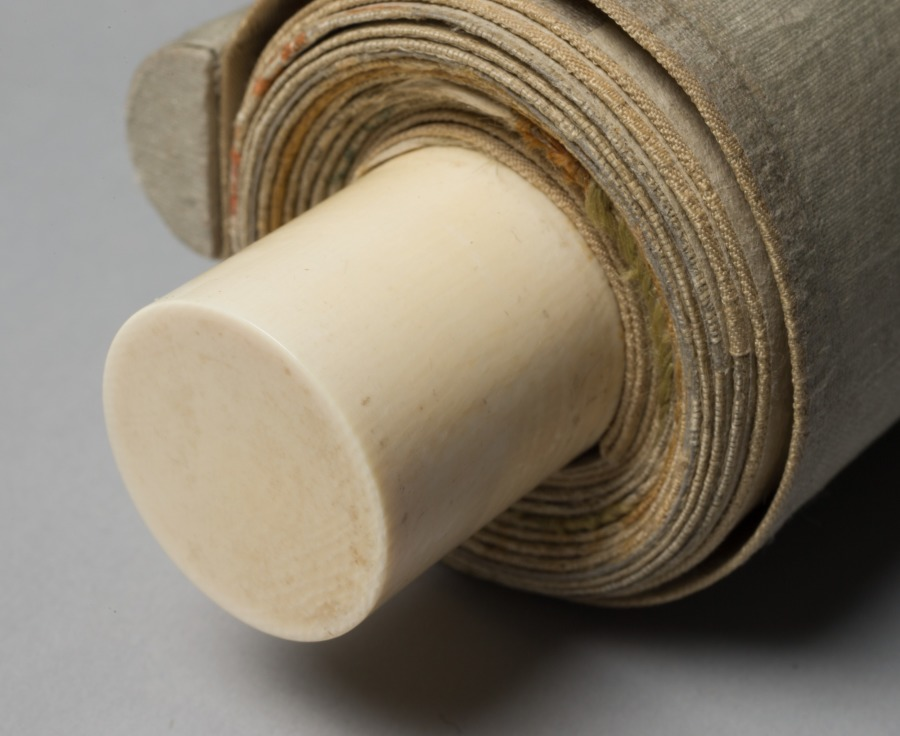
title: Courtesan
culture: Japan, Edo period (1615–1868)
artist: Matsuno Chikanobu (Japanese, active 1716–35)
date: 1716–35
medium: hanging scroll; ink and color on paper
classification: Painting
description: A glamorous courtesan sports an outer robe decorated with large roundels featuring plant motifs including iris and bush clover. Little is known about the life and artistic training of the painter Matsuno Chikanobu, an ukiyo-e artist who painted in a style strongly reminiscent of that of the Kaigetsudō studio. Many of his known paintings are on silk, and executed with high quality pigments, indicating that his primary clientele were wealthy individuals.